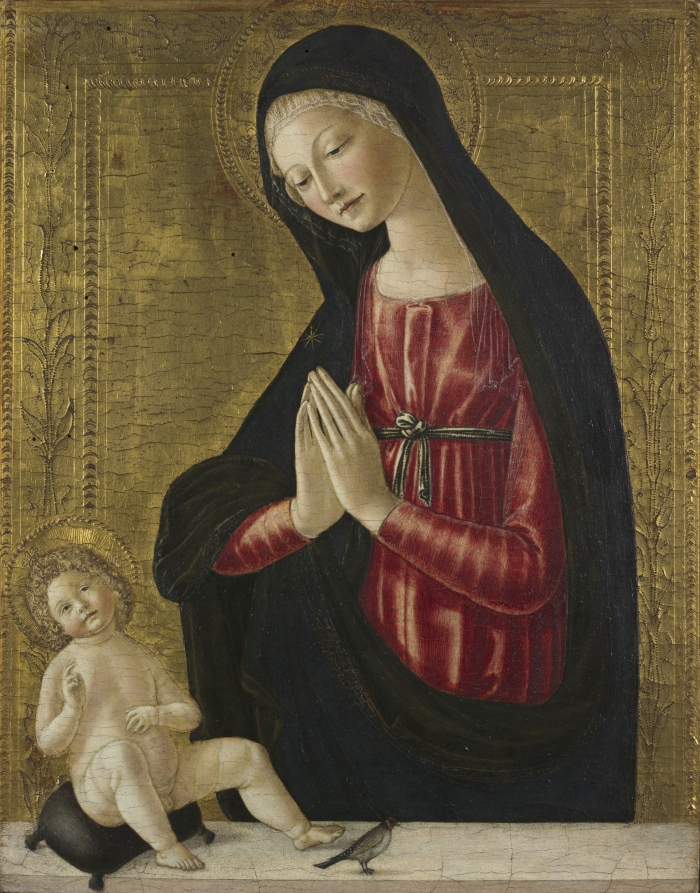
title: Virgin and Child with a Goldfinch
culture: Italy, Siena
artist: Neroccio de' Landi (Italian, 1447–1500)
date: c. 1490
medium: tempera on wood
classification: Painting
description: Neroccio di Bartolomeo de’ Landi was both a painter and sculptor. He was a student of Vecchietta, and then he shared a workshop with Francesco di Giorgio from 1468. Neroccio is considered by many to be a Madonna painter par excellence. His aristocratic images were much appreciated in his time, and he is perhaps among Siena’s last great painters of the 1500s.